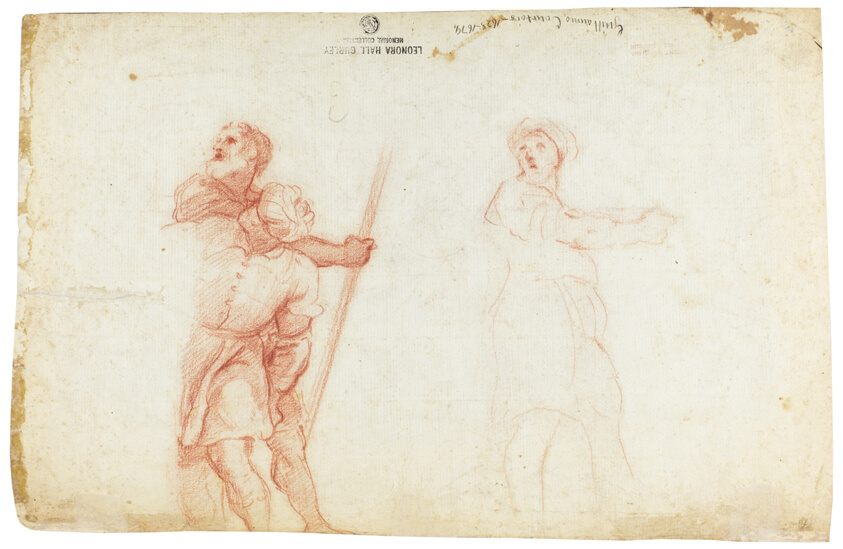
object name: Drawing and Watercolor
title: Dock Scene (recto); Two Sketches of Male Figures (verso)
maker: Guillaume Courtois (French, 1628-1679, active in Italy)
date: 1660/64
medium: Red chalk, on ivory laid paper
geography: France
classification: drawings (visual works); prints and drawing